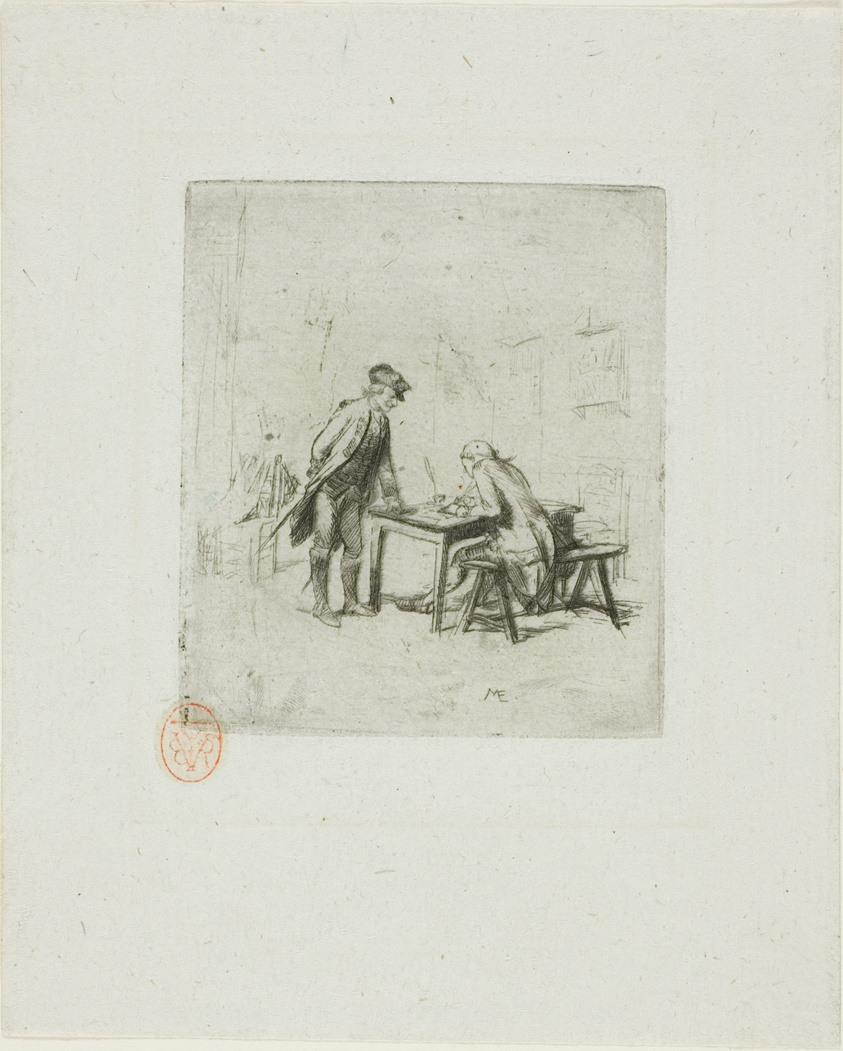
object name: Print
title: The Sergeant Reporter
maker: Jean Louis Ernest Meissonier (French, 1815-1891)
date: 1862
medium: Etching and drypoint on ivory laid chine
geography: France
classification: etching; print; prints and drawing